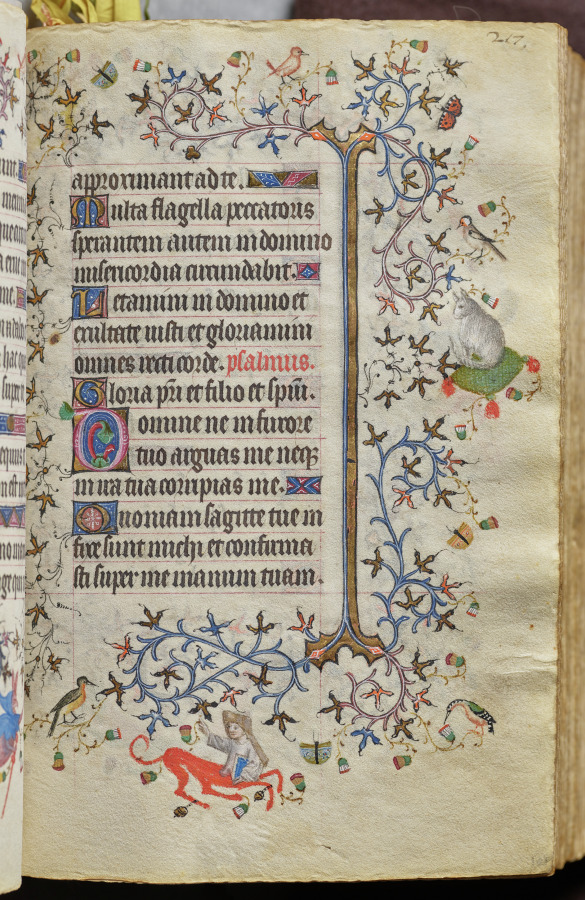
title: Hours of Charles the Noble, King of Navarre (1361-1425): fol. 109r, Text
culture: France, Paris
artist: Master of the Brussels Initials and Associates (French)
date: c. 1405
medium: ink, tempera, and gold on vellum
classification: Bound Volume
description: This precious book was highly prized by its owner, Charles III, King of Navarre, a French-born prince whose coat of arms is painted on 20 folios. Charles visited Paris on numerous occasions and likely acquired this volume there in 1404. Paris was the center of the European book trade at the time and attracted illuminators from many parts of Europe. This manuscript represents one of the most remarkable fusions of French and Italian taste in book illumination. Though conforming to Parisian standards, most of the book’s major miniatures are the work of the Brussels Initials Master, an Italian illuminator who previously worked in Bologna and Padua.